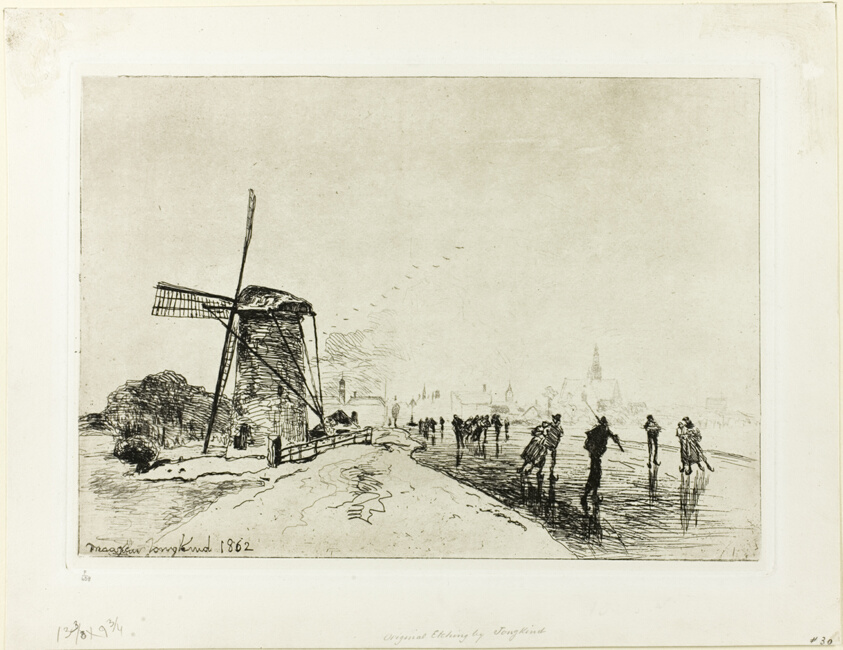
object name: Print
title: View of the Town of Maassluis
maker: Johan Barthold Jongkind (Dutch, 1819-1891)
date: 1862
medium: Etching on cream chine laid down on ivory wove paper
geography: Holland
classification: etching; print; prints and drawing